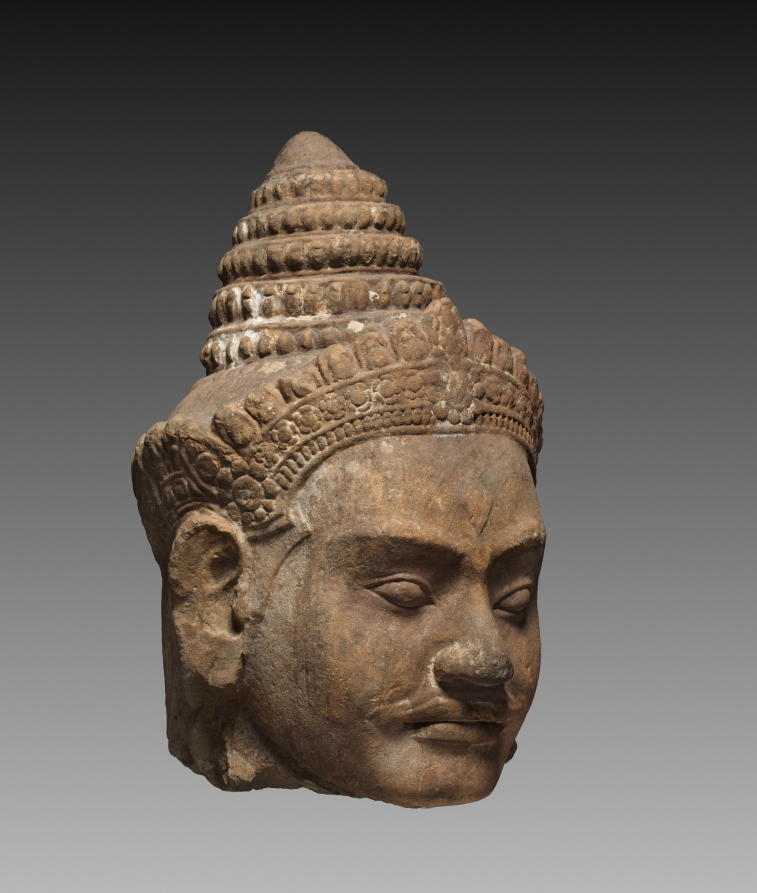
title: Colossal Head of a Deva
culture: Cambodia, Angkor, Preah Khan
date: c. 1200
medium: sandstone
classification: Stone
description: This head is from one of the gods (devas in Sanskrit) who, according to Hindu myth, churned the primordial Ocean of Milk to extract the nectar of immortality. Using a mountain as a churning rod and a serpent as the rope, the gods on one side and the demons on the other vied to win the nectar. The gods prevailed and achieved immortality.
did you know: The deity’s conical tiara consists of a diadem with floral decoration and is topped by a five-tiered lotus narrowing upward.